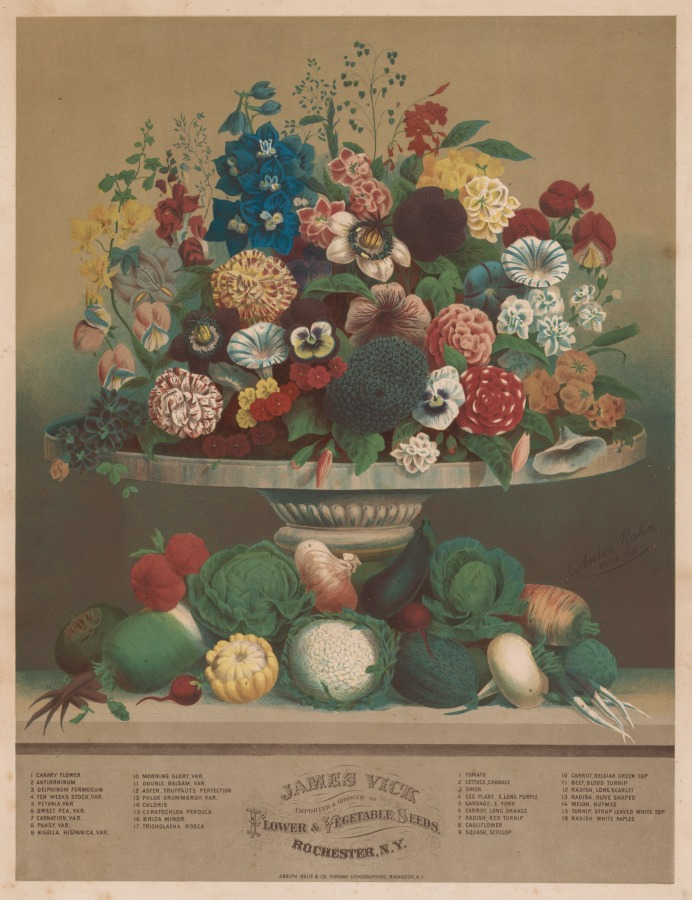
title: Flowers and Vegetables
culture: America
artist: Anton Carl Rahn (American, born Germany, 1842–1907)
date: 1800s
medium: Color lithograph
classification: Print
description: This lithograph served as an advertisement for the seeds sold at James Vick in Rochester, New York, a leading American nursery center in the latter half of the 19th century. An auxiliary business, the production of fruit and flower prints aided nurserymen and their travelling salesmen. At first the lithographs were hand colored, but in 1871 a local company began to print in color. Lithographs are made by drawing a design onto a stone with a greasy crayon; water adheres to the bare stone while the printing ink sticks to the greasy areas. The process was invented at the end of the 18th century and was often used after about 1820 because it is a speedy and inexpensive medium, producing more impressions compared to other tonal techniques such as mezzotint, aquatint, and stipple.